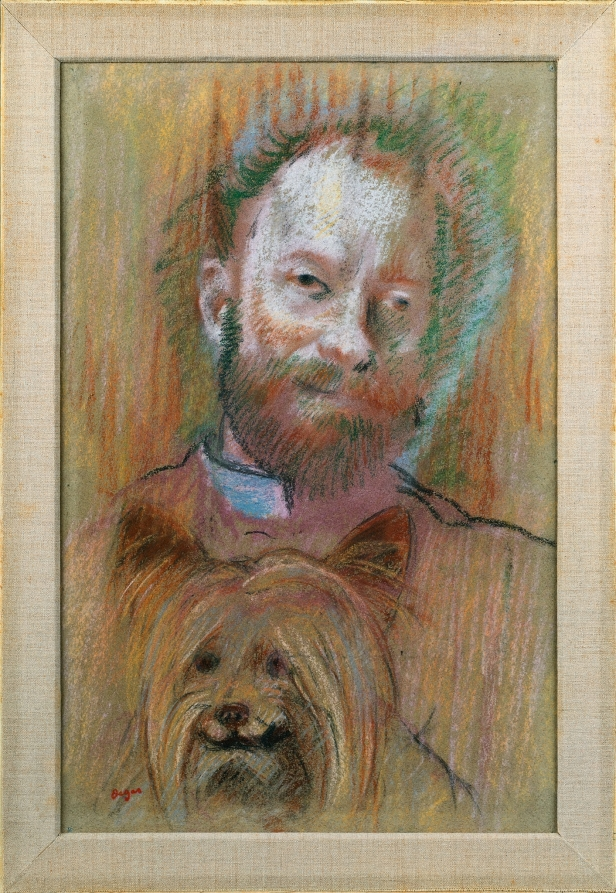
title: Ludovic Lepic Holding His Dog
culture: France, 19th century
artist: Edgar Degas (French, 1834–1917)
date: 1889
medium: pastel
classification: Drawing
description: Degas executed this portrait of his friend, the artist Ludovic Lepic, with rapid and expressive strokes of powdery pastel. The two artists worked together closely in printmaking early on, and this work is one of several commemorative depictions that Degas made throughout his career. Here, Lepic is seen with his pet, a Belgian Griffon, suggesting a fondness for dogs for which he was well-known in late-19th century Paris. He died just about one month after this portrait was completed at the age of 50.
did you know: Scholars have suggested that the unusual tonality of this drawing is due to the fact that it was executed in artificial rather than natural light.